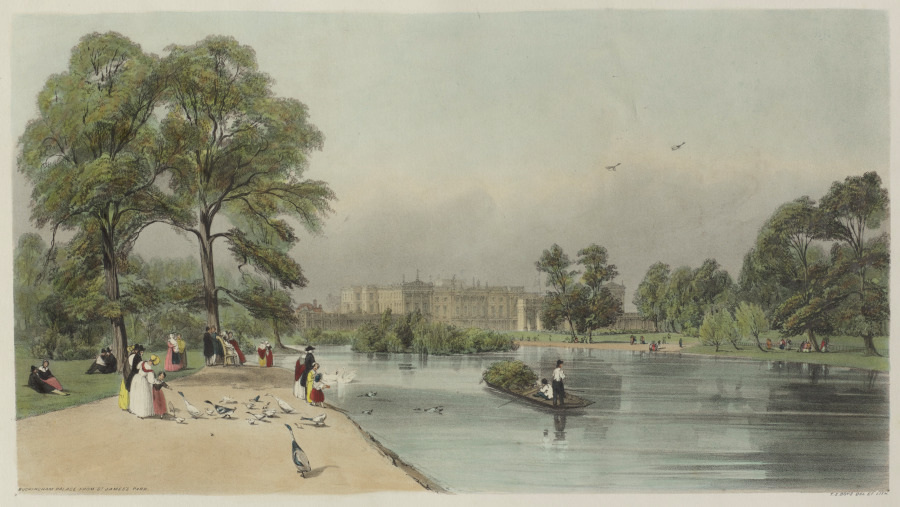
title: London As It Is: Buckingham Palace, from St. James's Park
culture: England, 19th century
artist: Thomas Shotter Boys (British, 1803–1874)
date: 1842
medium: lithograph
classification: Bound Volume